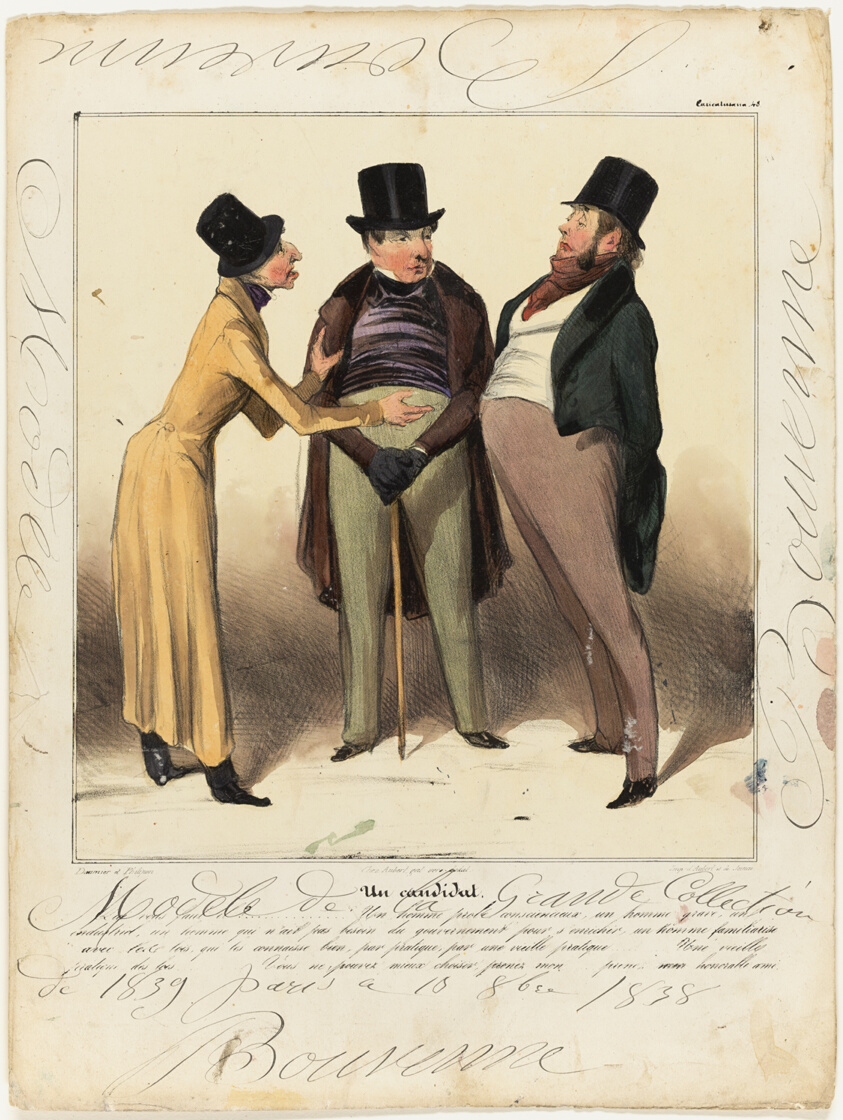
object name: Print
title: A Candidate. “Who do you want?... An upright, conscientious, sober man, an industrialist, a man who doesn't need the government to enrich himself, a man familiar with the law, who knows it well, through practice, very long practice... a long practice of law... you can't choose any better than... my honorable friend,” plate 48 from Caricaturana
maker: Honoré Victorin Daumier (French, 1808-1879); model by Édouard Bouvenne (French, active 19th century)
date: 1837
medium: Hand-colored lithograph in black, heightened with gum arabic on ivory wove paper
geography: France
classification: lithograph; print; prints and drawing